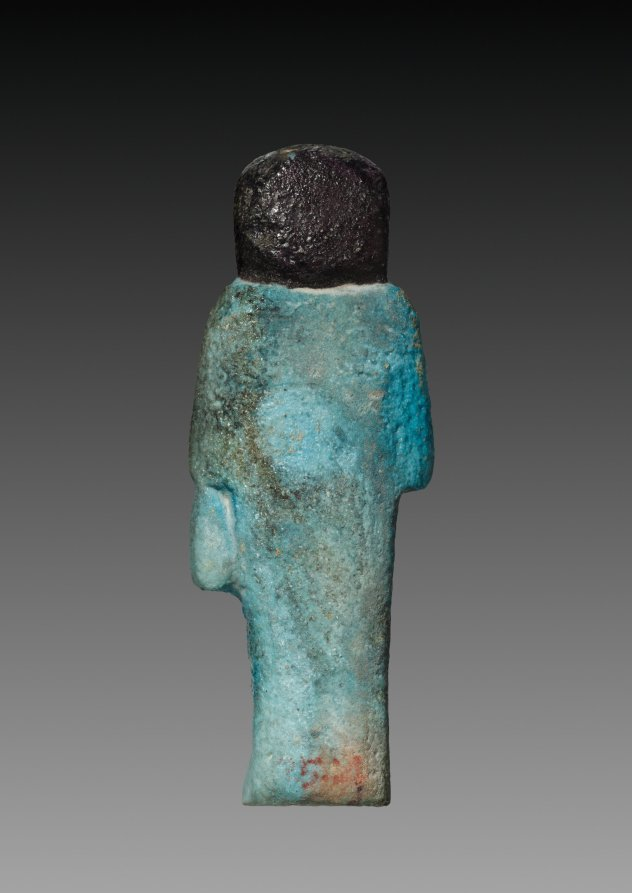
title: Overseer Shawabty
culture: Egypt, Third Intermediate (1069–715 BCE), Dynasty 21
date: 1069–845 BCE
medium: turquoise faience with dark purple decoration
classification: Funerary Equipment